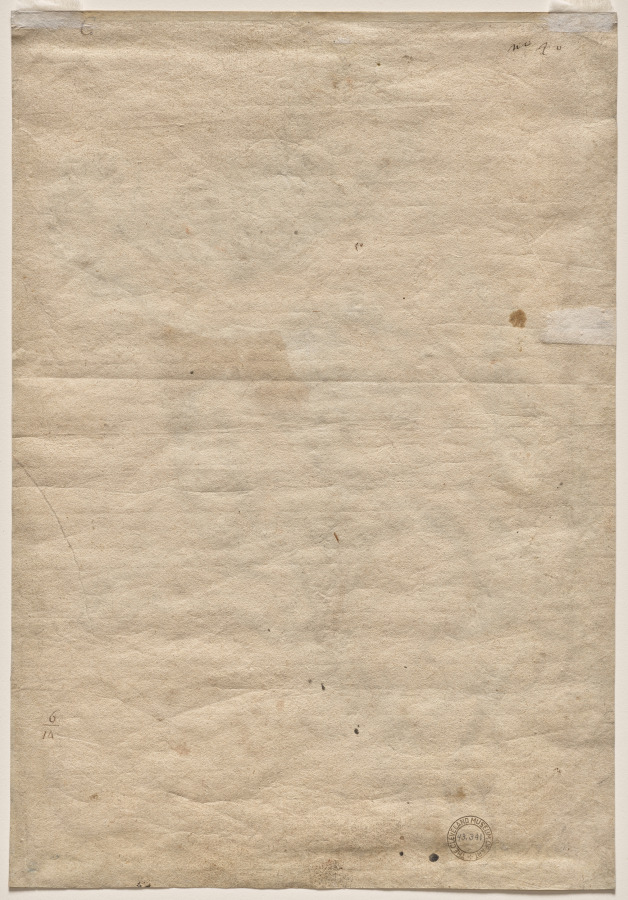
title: A Faun Grasping a Bunch of Grapes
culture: Flanders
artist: studio of Peter Paul Rubens (Flemish, 1577–1640)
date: after 1616–18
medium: black chalk and brush and brown wash; framing lines in pen and black ink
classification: Drawing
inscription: VERSO, upper right, in brown ink: no 40 ; lower left, in brown ink: 6/14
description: This drawing relates to a finished painting (now lost) by Peter Paul Rubens that depicted a faun (a woodland creature similar to a satyr) squeezing grapes into the mouth of a young Bacchus. That figure, shown here, could be Silenus, who educated Bacchus on the pleasures of wine, revelry, and nature. Rubens ran a large studio and employed numerous apprentices, one of whom may have made this copy after the original painting. As a form of instruction, Rubens added ink wash to the drawing to enhance the shading on the figure and shadows behind it.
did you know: Swirling draperies like the one haphazardly worn by this faun do more than conceal, in many cases they reveal an artist's technical skill. To render folds and gathers in fabric, artists used chiaroscuro, meaning contrasting light and dark tones.